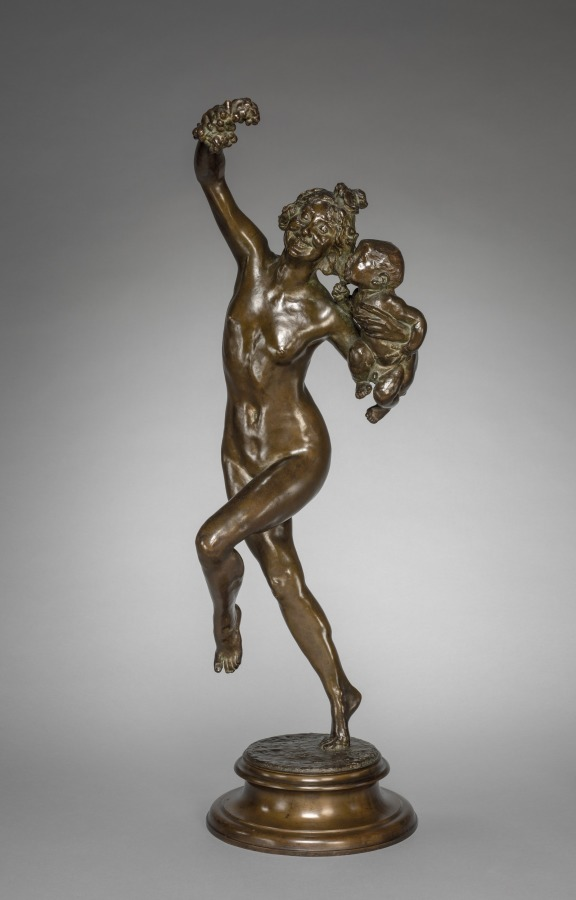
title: Bacchante and Infant Faun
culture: America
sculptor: Frederick William MacMonnies (American, 1863–1937)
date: 1894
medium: bronze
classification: Sculpture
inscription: Signed on base: F. Macmonnies, 1894.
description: This sculpture is a smaller version of a three-quarter life-size bronze given by the artist to Charles McKim, the architect for the Boston Public Library who placed the statue in the fountain of the library's courtyard. Although the vast majority of Bostonians supported the statue, a small but powerful group denounced it as "debauched," "vice-ridden," and "treason to purity and sobriety and virtue, and Almighty God." The opponents included the Boston Brahmins—a group of Anglo-Saxon, Protestant elite—and various religious, temperance, and antivice organizations. Feeling threatened by the swell of immigrants and by the changing roles of women, these groups hoped that the library would offer an alternative to the saloons frequented by Boston's lower classes. But a statue of a nude woman reveling under the effects of wine from the Roman god Bacchus only devalued this bastion of civilization. Consequently, the Boston Art Commission rejected the statue in 1897. However, in 1992 Boston's Art and Humanities commissioner and the library trustees returned a version of the original to the courtyard without public protest.